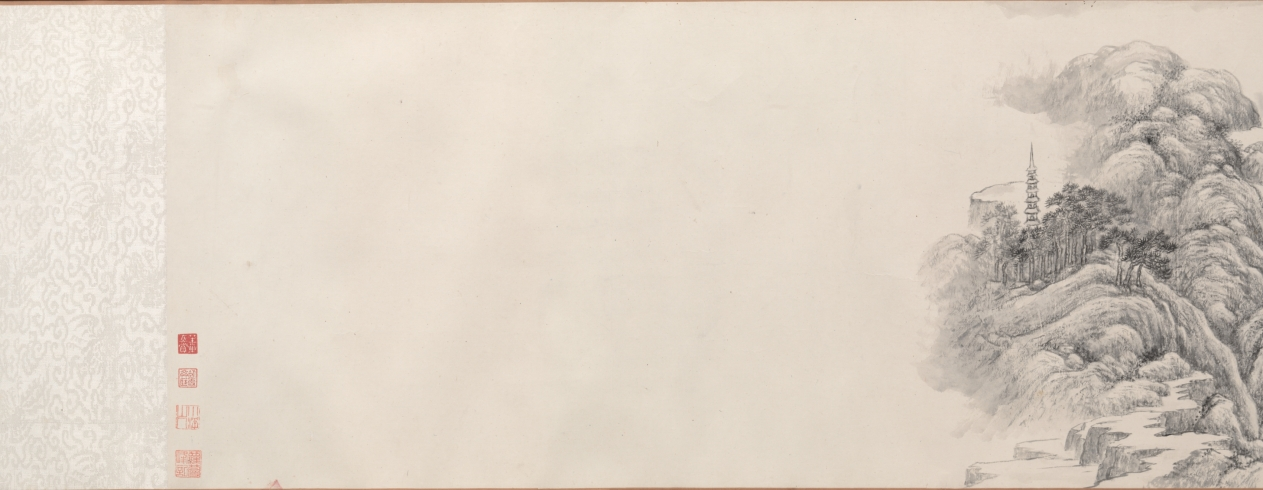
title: Rain-coming Pavilion by the Stone Bridge at Mt. Tiantai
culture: China, Qing dynasty (1644-1911)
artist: Dai Xi (Chinese, 1801–1860)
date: 1848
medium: handscroll, ink on paper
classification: Painting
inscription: Artist's inscription, signature, and 2 seals: Painting of Rain-Coming Pavilion by the Stone Bridge at Mount Tiantai. In the twenty-eighth year of the Daoguang era [1848], the third lunar month, requested by and painted for Pan Gongfu 潘功甫 [Pan Zengyi 潘曾沂], a senior family friend. [signed] Your junior, Dai Xi from Qiantang. [seal] Hebi jian Dai 何必見戴. [seal, lower right corner] Shih-ping yeh.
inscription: Title on frontispiece and 3 seals of Ruan Yuan (1764-1849). 1 colophon and 10 additional seals: 1 colophon, dated 1838, and 8 seals of Pan Zengyi (1792-1853); 2 seals unidentified.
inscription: Colophon by Pan Zengyi: The T'anhua [a flower that blooms only momentarily in semi-tropical areas] Pavilion near Shiliang [the natural stone bridge] was built by the Grand Chancellor Jia. It lasted over seven hundred years. After it was destroyed this year, I happened to be there, so I suggested it be reconstructed. Among the six poems commemorating my visit, one reads: The career of the Prime Minister may be as great as the rivers and lakes,/ Unaware himself of the fact there is leaking./ I had been all over the seventy-two peaks of P'eng-lai mountains/ When the timely rain came to T'an-hua Pavilion. It had not been raining for a long time there, then unexpectedly, the rain came simultaneously with my arrival; the old monk there asked me to change the name to Rain-Coming Pavilion, in order to record the joy. The hilly fields at Mt. Tiantai have suffered by droughts. If, from this year on, they have the timely rain to bring along bountiful harvests and make people happy - so may this pavilion be our witness. Hsiao-fu shan-jen, Pan Zengyi recorded this on the first day of the twelfth lunar month in the wuxu year [1838]. Chiang Yung-ching copied respectfully on the first day of the sixth lunar month in the wushen year [1848]. trans. LYSL/WKH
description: The subject is not just Mount Tiantai in Zhejiang Province, the ancient seat of the most powerful Buddhist sect of Sui and Tang dynasties, but records a specific occasion in 1838 when an official visited Tiantai and began the reconstruction of a historic pavilion. As this coincided with the end of a long drought, the building was auspiciously renamed the Yulai (Rain-Coming 雨來) Pavilion. Ten years later, Dai Xi painted this handscroll to commemorate the occasion.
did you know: Dai Xi actively resisted the Taiping rebels and drowned himself after their 1860 capture of his hometown, Hangzhou. For this loyal deed, Dai was posthumously rewarded with a temple built in his name.